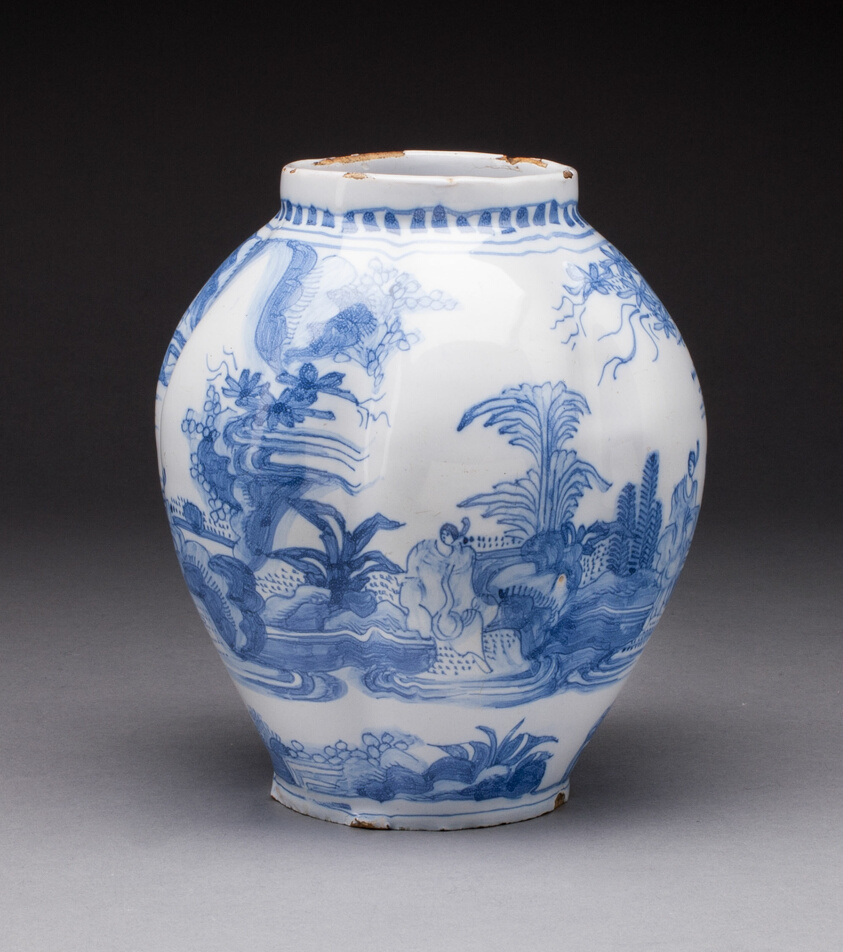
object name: Ceramics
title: Vase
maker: Netherlands, Delft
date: c. 1700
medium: Tin-glazed earthenware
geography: Delft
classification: vase; earthenware; vessel; european decorative arts; ceramics